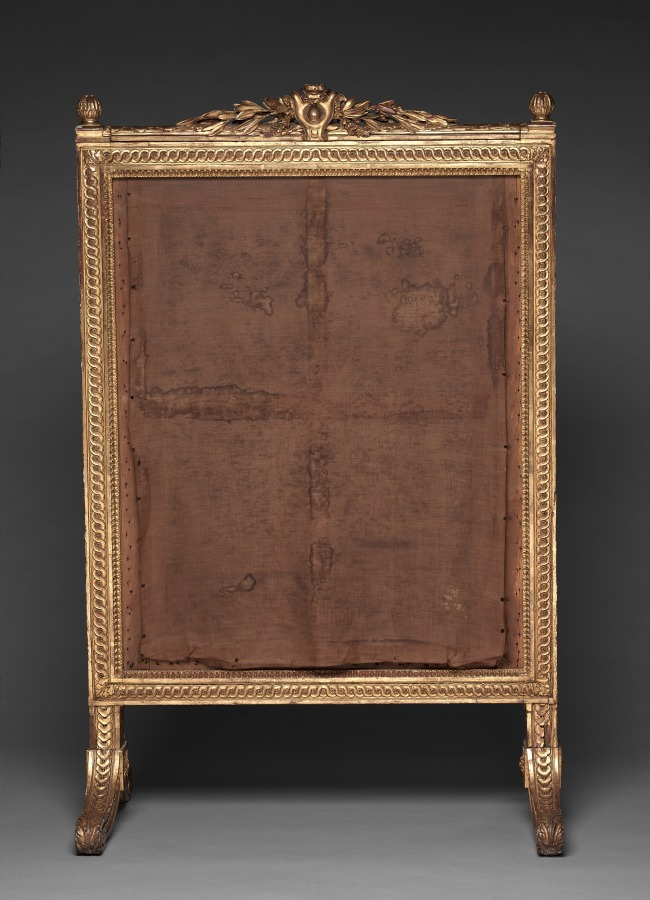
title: Fire Screen (Écran de Cheminée) and Textile Panels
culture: France, Paris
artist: Georges Jacob (French, 1739–1814)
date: c. 1780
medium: gilt wood, upholstery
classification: Furniture and woodwork